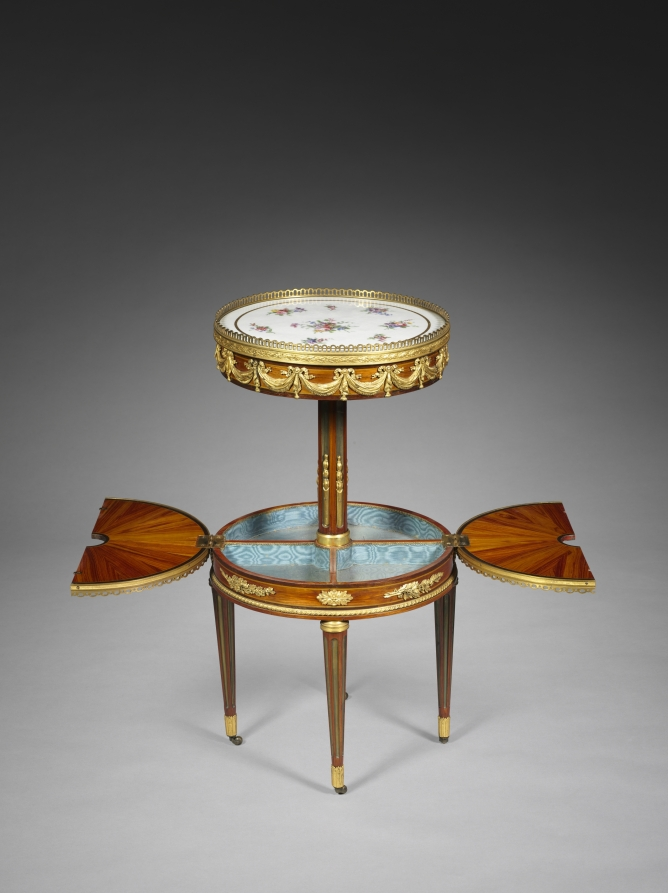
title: Worktable (Bureau de Toilette)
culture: France, Paris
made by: Martin Carlin (French, 1730–1785)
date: c. 1755–1785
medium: wood marquetry with gilt bronze mounts, Sèvres porcelain top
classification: Furniture and woodwork